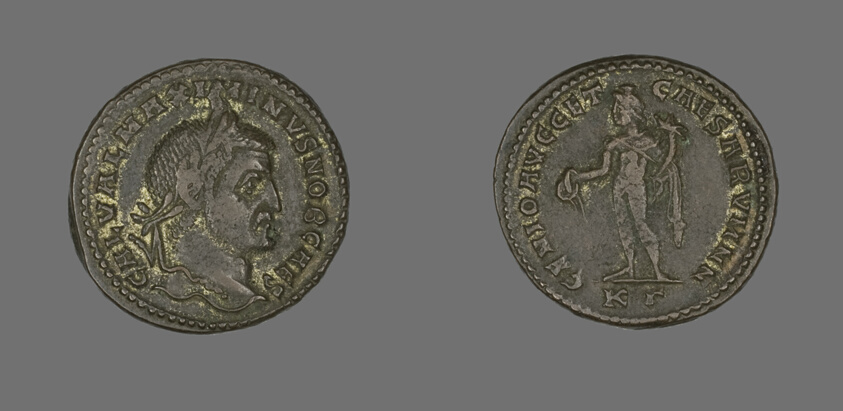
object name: Coin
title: Coin Portraying Emperor Maximinus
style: greco-roman, greco-roman (egyptian)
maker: Roman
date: 305-309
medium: Bronze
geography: Ancient Mediterranean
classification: coin; ancient art